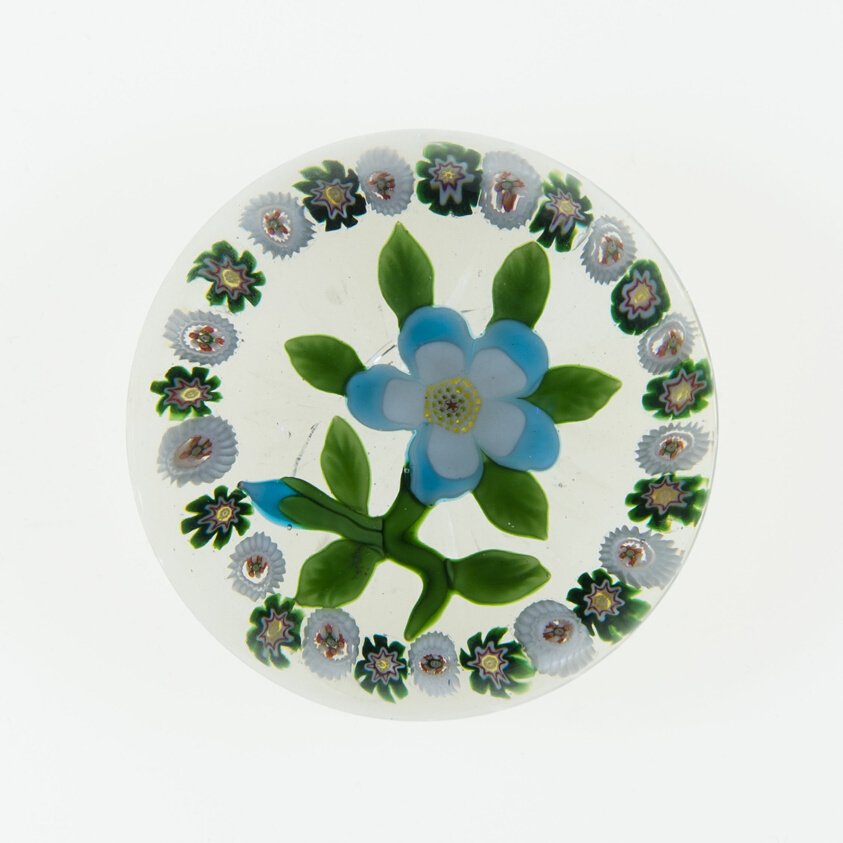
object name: Glass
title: Paperweight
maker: Baccarat Glassworks (Cristalleries de Baccarat); Lorraine, France, founded 1764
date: c. 1848–55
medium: Glass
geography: Lunéville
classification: paperweight; lampwork; european decorative arts; glass